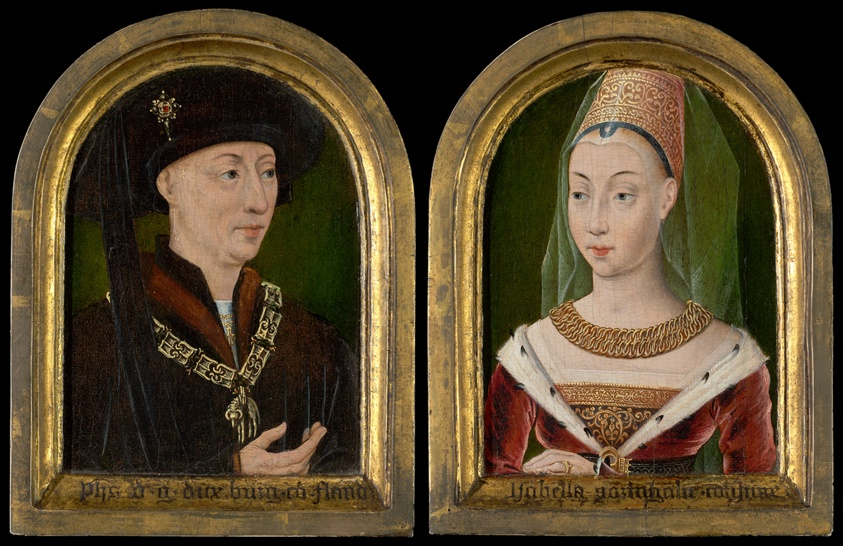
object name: Painting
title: Philip the Good, Duke of Burgundy; Isabelle of Bourbon (?)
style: 16th Century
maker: Flemish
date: 1510–30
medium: Oil on panel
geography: Flanders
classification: painting; oil on panel; oil paintings (visual works); flemish; paint; portrait; european painting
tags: portrait, hat, headdresses, jewelry, man, nobility, portraits: European subject, portraits: female subject, portraits: male subject, robes, wealth, woman, luxury